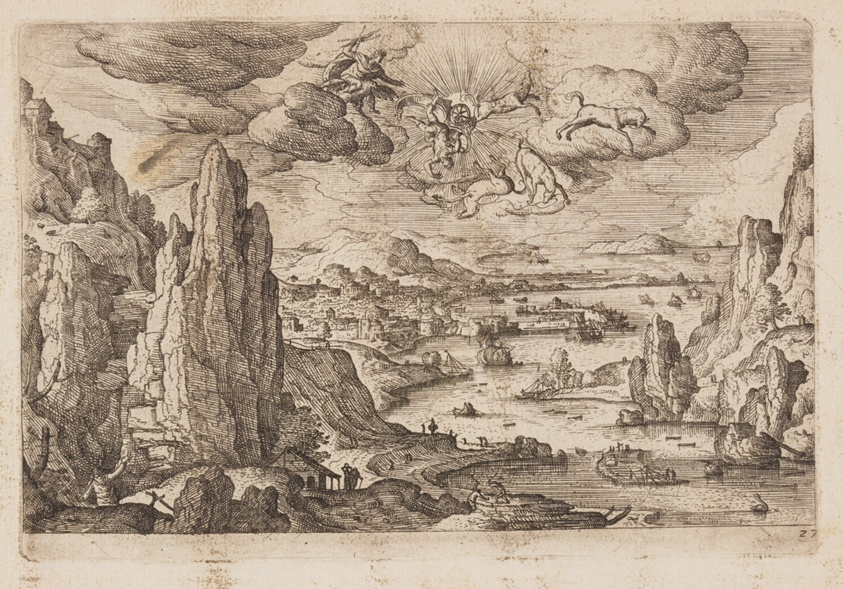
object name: Print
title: Plate 27, from Landscapes with Scenes from the Old and New Testament and Ovid’s Metamorphoses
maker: Hans Bol (Flemish, 1534–1593); published by Philip Galle (Flemish, 1537–1612)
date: 1574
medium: Etching on ivory laid paper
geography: Flanders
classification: print; paper; prints and drawing; etching